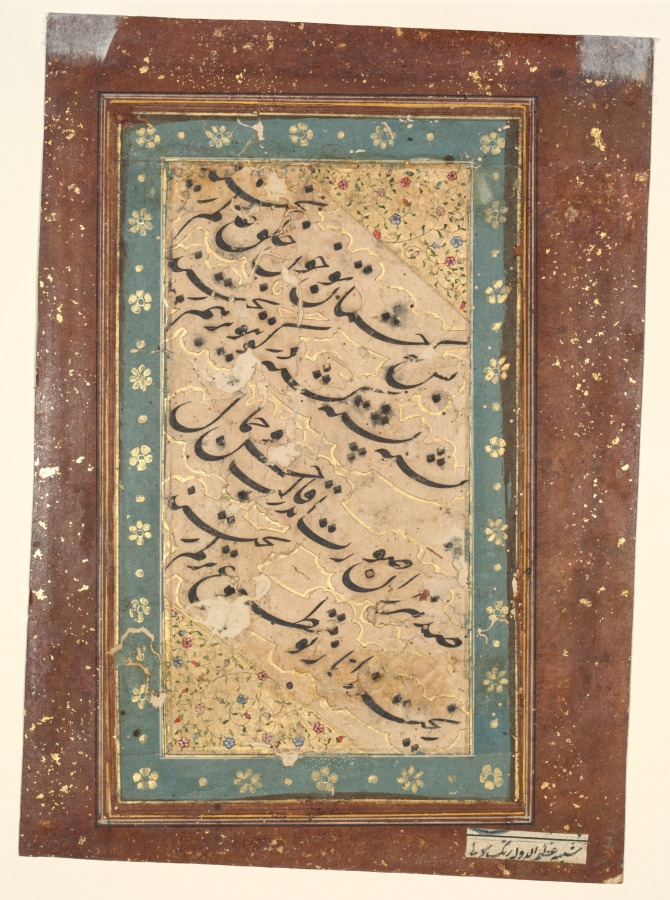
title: Calligraphy of a Quatrain (verso)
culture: India, Farrukhabad, Mughal, 18th century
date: c. 1760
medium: Gum tempera, ink, and gold on paper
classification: Calligraphy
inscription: Persian verse in nasta‘liq script: Your eyes have shed so much blood in the world at large/ That around your home corpses are strewn together in disorderly piles./ A hundred thousand faces were cast into molds of loveliness and beauty/ But rarely came out stamped as comely as you.